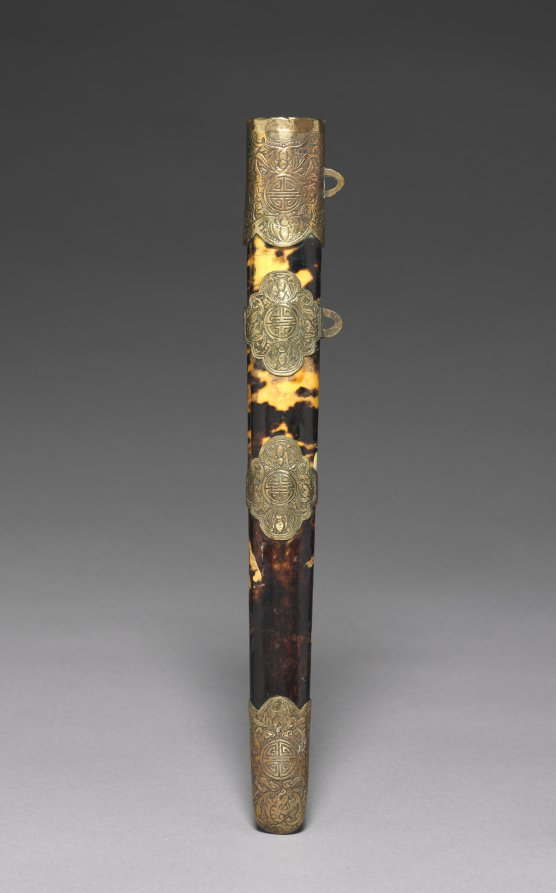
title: Scabbard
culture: Korea, Joseon dynasty (1392–1910)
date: 1800s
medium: metal and tortoiseshell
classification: Arms and Armor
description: The tortoise shell was a popular material for sword decoration for its association with the legend of ancient heroes. For example, a tortoise is believed to have helped rulers tame natural disasters.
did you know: The tortoise shell was a popular material for sword decoration for its association with the legend of ancient heroes.